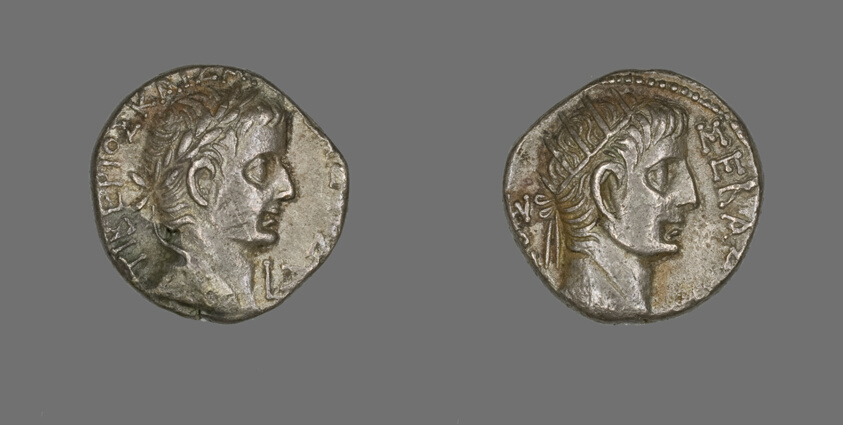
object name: Coin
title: Tetradrachm (Coin) Portraying Emperor Tiberius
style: roman period (egyptian), greco-roman (egyptian)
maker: Roman; minted in Alexandria, Egypt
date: 14-37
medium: Billon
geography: Egypt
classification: coin; ancient art